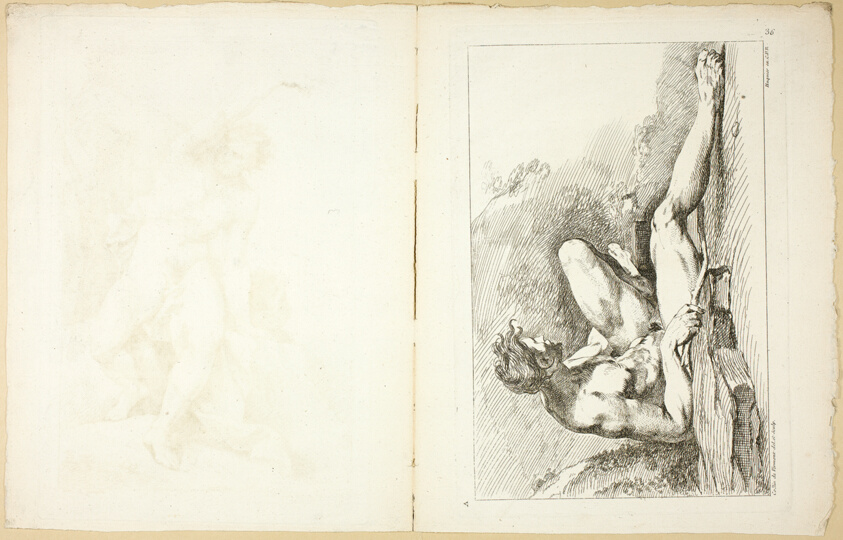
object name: Print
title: Page 33 and Page 36, from Premier Livre de Figures d'Academies gravées en Partie par les Professeurs de l’ Académie Royale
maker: Charles-Joseph Natoire (French, 1700-1777); Collin de Vermont (French, 1693-1761); printed by Gabriel Huquier (French, 1695-1772); published by Charles-Antoine Jombert (French, 1712-1784) (French, 18th century)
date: published 1737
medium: Etching on ivory laid paper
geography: France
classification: etching; print; prints and drawing